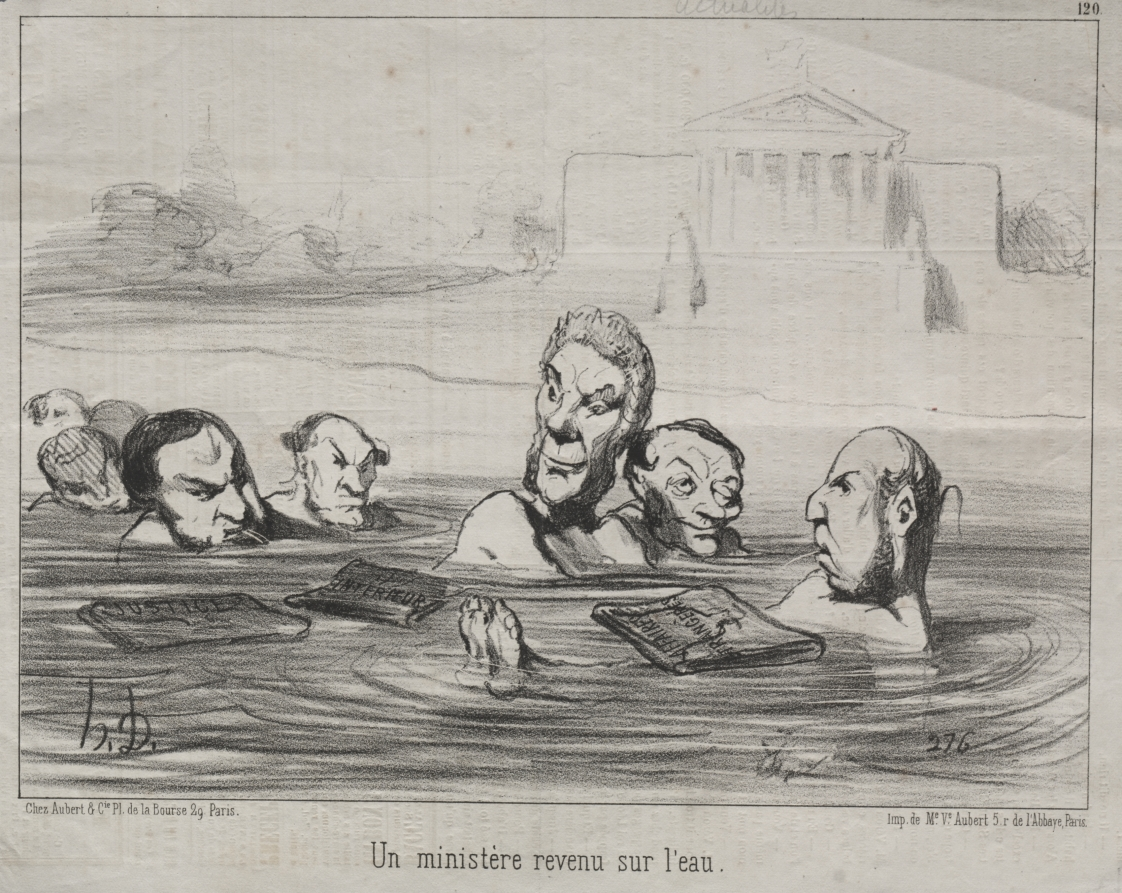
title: A minister back in the water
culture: France, 19th century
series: News of the Day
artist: Honoré Daumier (French, 1808–1879)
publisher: Aubert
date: 1851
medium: lithograph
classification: Print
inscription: Upper margin, pencil: Actualités ; Lower margin, pencil: good imp / 46.206 Del. VI. 2101, state II/II / [faint] 2101 / 3; Lower margin, printed: Chez Aubert & Cie. Pl. de la Bourse 29. Paris. / Imp. de Me. Ve. Aubert 5. r. de l'Abbaye, Paris.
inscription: Above image, printed: ACTUALITÉS. / 120; Below image, printed: Un ministère revenu sur l'eau..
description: This print was published in Le Charivari (April 26, 1851) as plate 120 from the series News of the Day